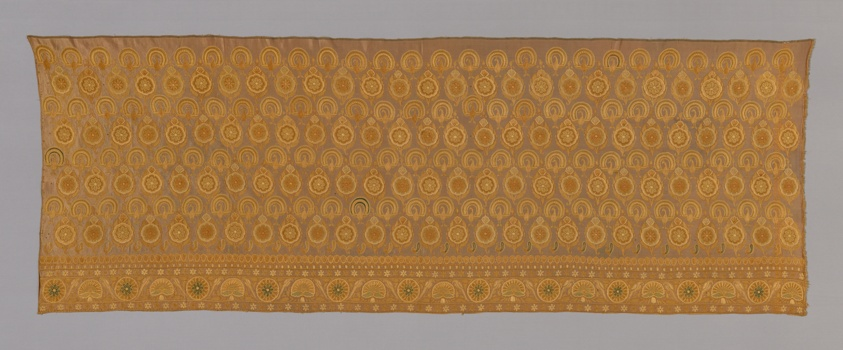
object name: Textile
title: Border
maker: India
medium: Embroidered; peacock and leaf design on satin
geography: India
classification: textile; weaving; needlework (visual works)